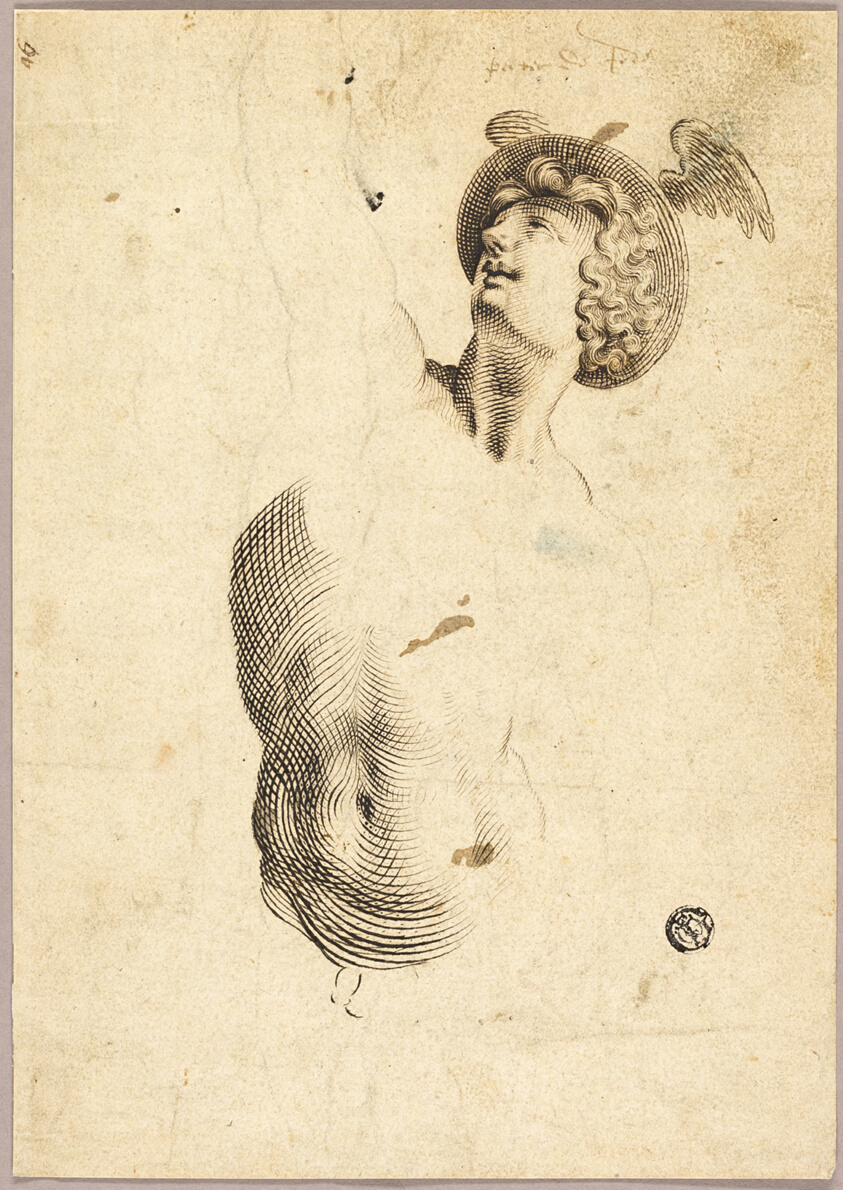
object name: Drawing and Watercolor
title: Mercury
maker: Attributed to Pieter de Jode I (Flemish, 1570-1634) or Jan Hamensz. Muller (Dutch, 1571-1628); after Giovanni da Bologna (Flemish, 1529-1608)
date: c. 1600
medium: Pen and brown ink with traces of black chalk on cream laid paper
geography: Holland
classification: pen and ink drawings; drawings (visual works); prints and drawing